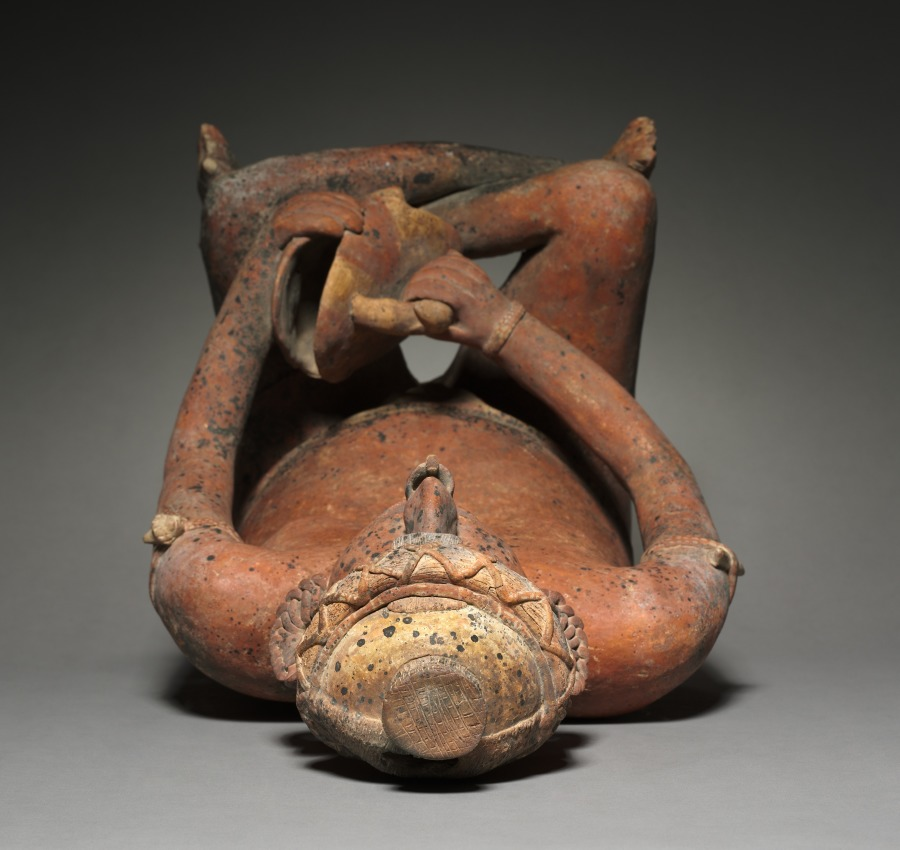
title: Male Seated Figure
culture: Mexico, Nayarit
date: 100 BCE–300 CE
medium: ceramic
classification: Ceramic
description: This couple-extremely fine examples of their kind-may commemorate the marriage of an important person, such as a chief, but could also represent siblings of a chiefly family. Whatever their relationship, their unity is conveyed by their physical similarities, including their jewelry, which marks high social station. The female is unusual in nursing an infant, likely a reference to generational renewal and the continuation of noble bloodlines. The significance of the male’s activity-beating a turtle-shell drum- is not understood.